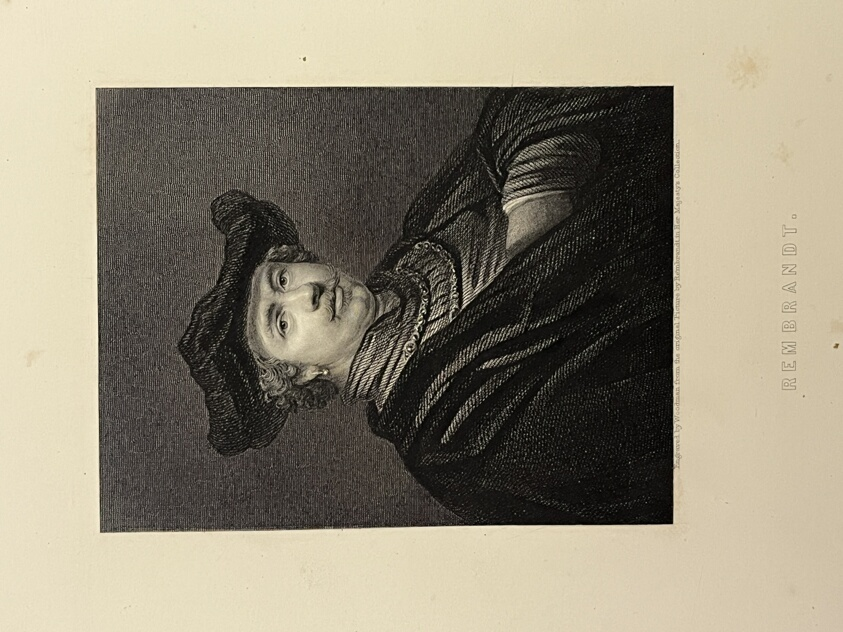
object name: Print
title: Rembrandt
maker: Woodman (likely American or British, 19th century); after Rembrandt van Rijn (Dutch, 1606-1669)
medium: Steel engraving on paper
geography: United States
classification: reproduction; print; prints and drawing